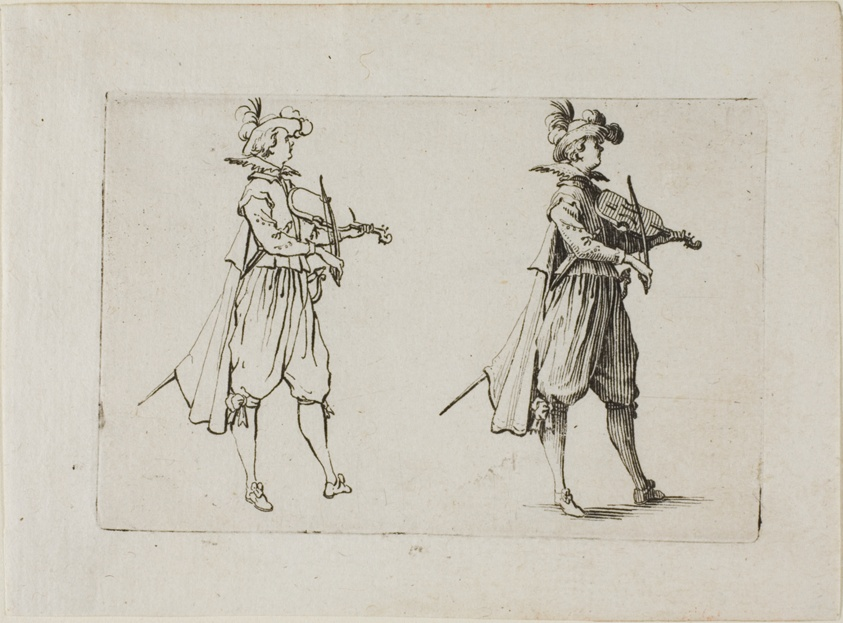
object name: Print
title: The Violin Player, from The Caprices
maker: Jacques Callot (French, 1592-1635)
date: c. 1622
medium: Etching on ivory laid paper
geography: France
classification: etching; print; prints and drawing